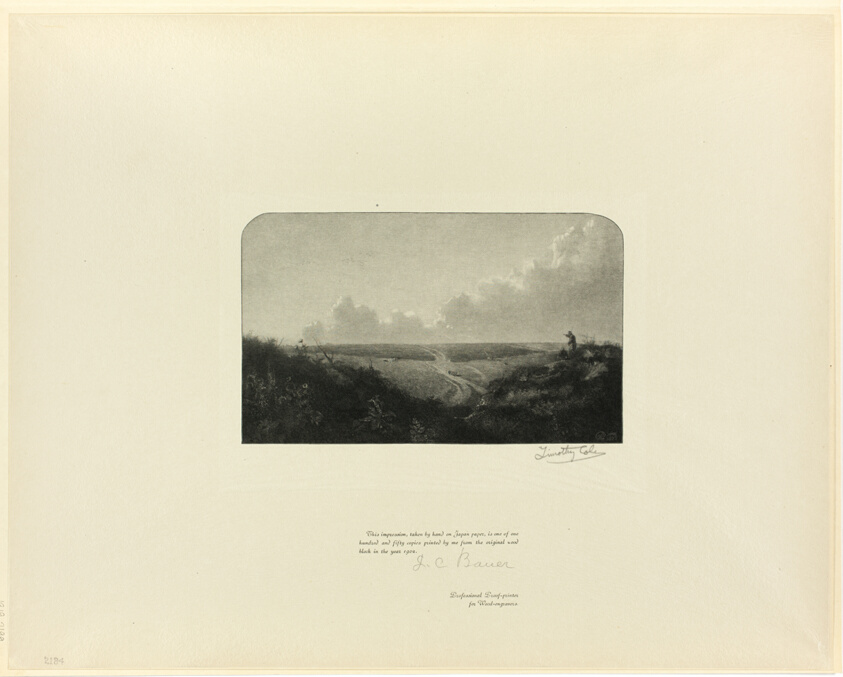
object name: Print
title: Mousehold Heath, from Old English Masters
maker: Timothy Cole (American, born England, 1852-1931); after John Crome (English, 1768-1821)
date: 1899, printed 1902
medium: Wood engraving on chine paper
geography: United States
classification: wood engraving; print; prints and drawing